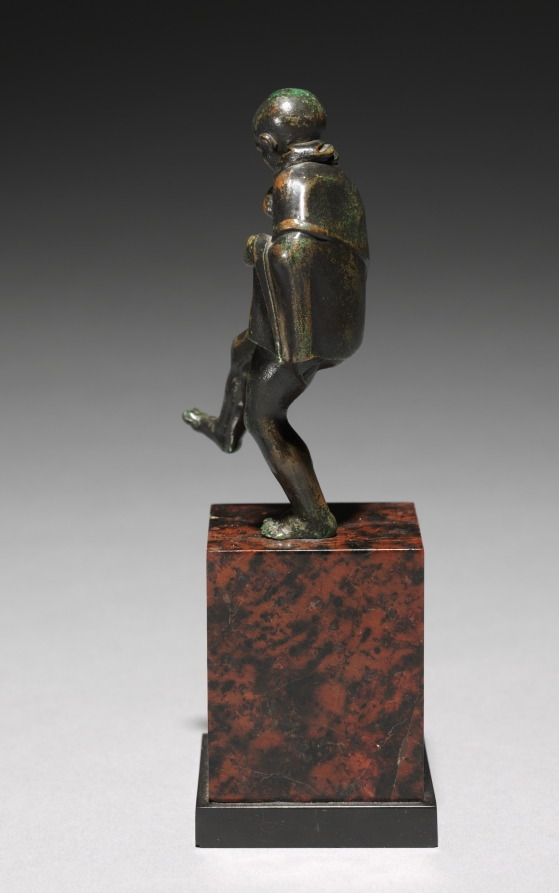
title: Dancing Boy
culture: Northern Italy, early 16th century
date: c. 1500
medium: bronze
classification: Sculpture